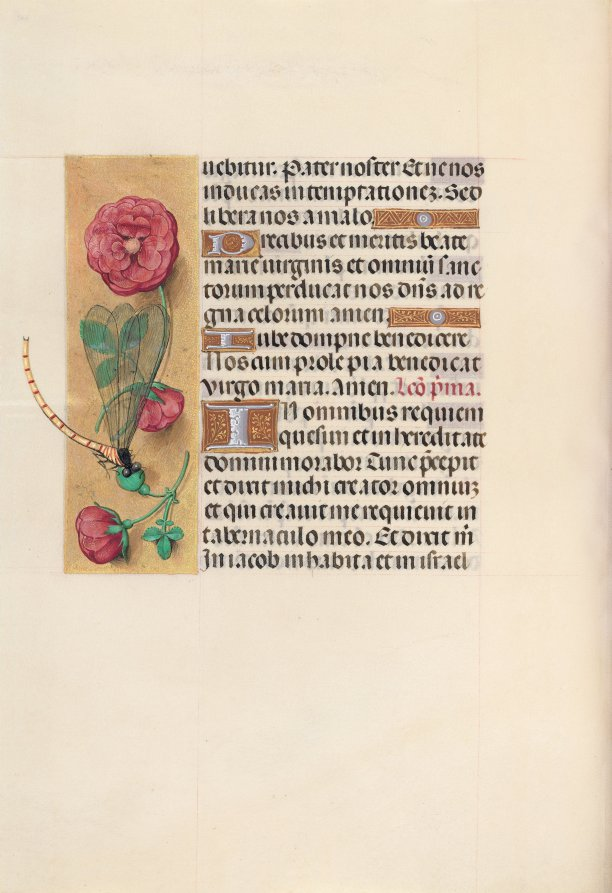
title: Hours of Queen Isabella the Catholic, Queen of Spain: Fol. 110v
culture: Flanders, Ghent and Bruges, late 15th century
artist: Master of the First Prayerbook of Maximillian (Flemish, c. 1444–1519)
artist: and Associates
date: c. 1500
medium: ink, tempera, and gold on vellum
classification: Bound Volume